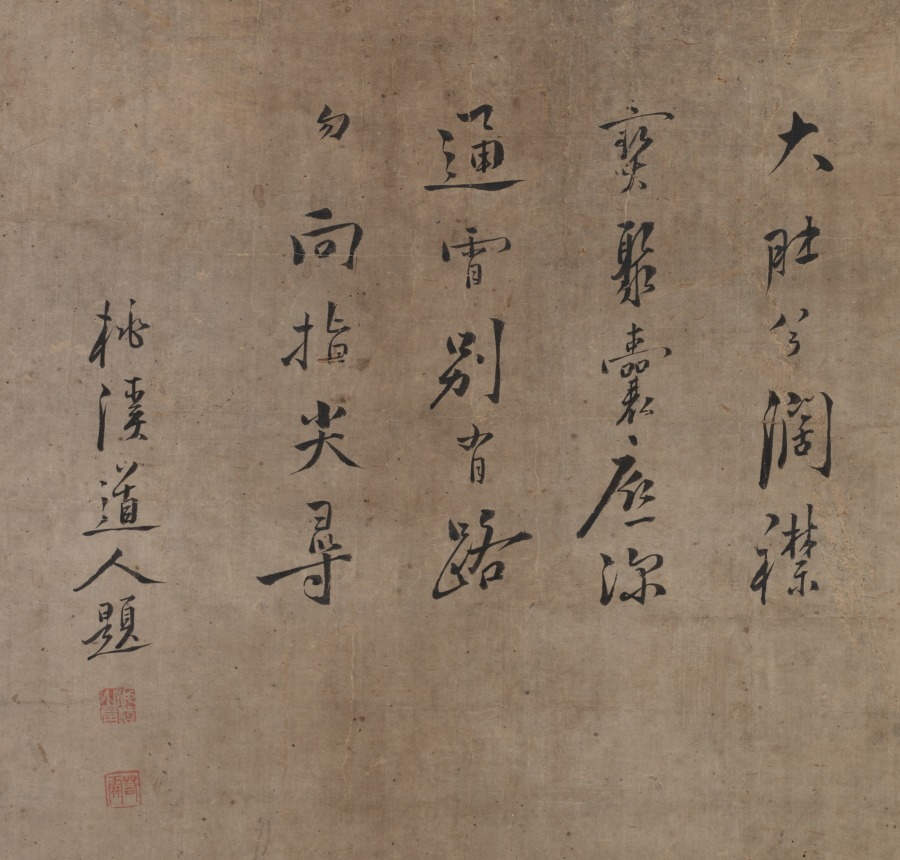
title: Hotei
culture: Japan, Muromachi period (1392–1573)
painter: Yamada Dōan I (Juntei) (Japanese, d. 1573)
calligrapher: Tōkei Jakurin (Japanese, dates unknown)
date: mid-1500s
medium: hanging scroll; ink on paper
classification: Painting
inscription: 桃渓道人 題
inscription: 大肚兮濶襟 寶聚嚢底沵 通霄別有路 勿向指尖尋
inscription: 落款 桃渓之印 若霖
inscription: 印章 山田氏道安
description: Hotei is a semilegendary figure who may have lived from the late 800s to the early 900s. He later became prominent in Chan (or Zen, in Japanese) Buddhist literature. He epitomizes the freewheeling figure outside the mainstream monastic system—in which people strive for enlightenment through prescribed methods—who nonetheless attains a high level of spiritual awakening. The inscription warns against seeking enlightenment by conscious effort: Big stomach, gaping garment, Treasures gathered deep in the bottom of his bag, Passing through the sky is another road, Do not seek that to which his fingertip points.